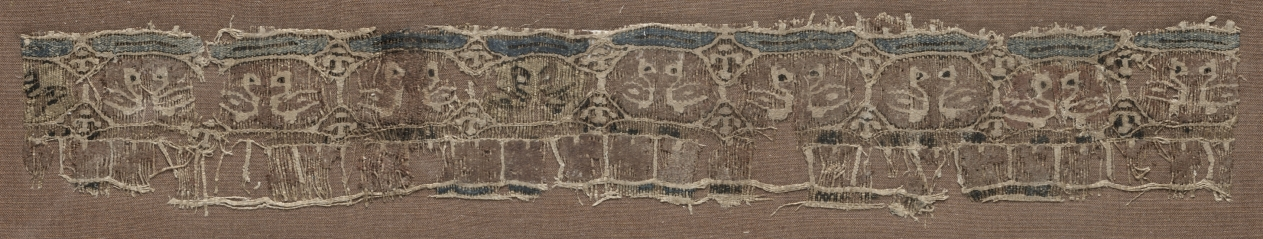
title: Fragment of a Tiraz-Style Textile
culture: Egypt, Fatimid period, Caliphate of al-Musta'li or al'Amir, AH 487-524, 11th-12th Century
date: 1094 – 1130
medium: tapestry (originally inwoven in a tabby ground); linen and silk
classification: Textile